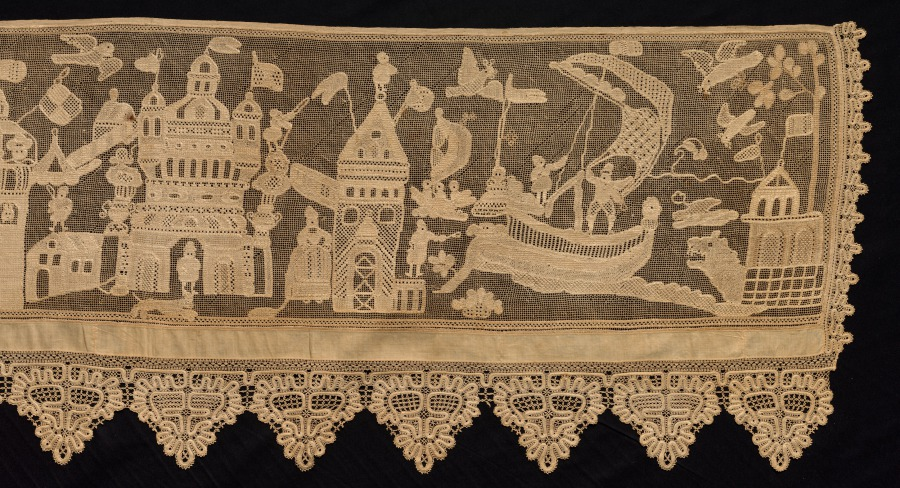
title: Lace Border with Battle Scene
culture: Russia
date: 1700s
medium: Linen; needle lace (cutwork and drawnwork), straight (continuous) bobbin lace, (tape lace) edging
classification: Lace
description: This valance, a decorative drapery made for attachment at the frame of the bed, was a typical object from the dowry of a bride in eighteenth and nineteenth-century Russia. The valance would have been made for the wedding night of a newlywed couple. The elaborate battle scene rendered in this lace is unusual and exceptional.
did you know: Handmade lace for marriage dowries was produced in large quantities in Russia during the eighteenth and nineteenth centuries.